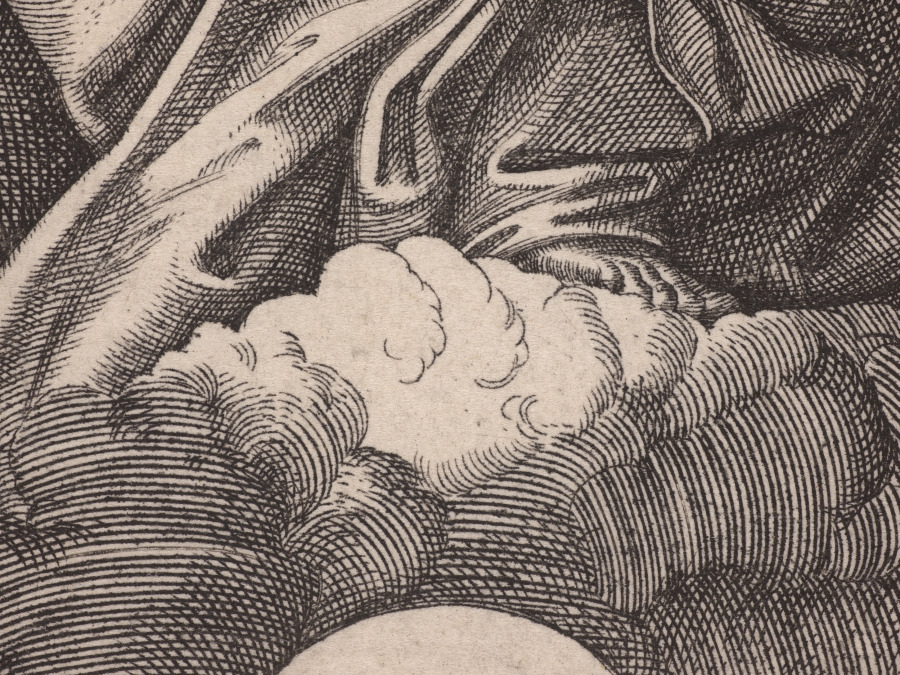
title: Christ, the Virgin, and St. John the Baptist with Saints Paul and Catherine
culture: Italy, 16th century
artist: Marcantonio Raimondi (Italian, 1470/82–1527/34)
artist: after Raphael (Italian, 1483–1520)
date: c. 1520–25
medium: engraving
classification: Print